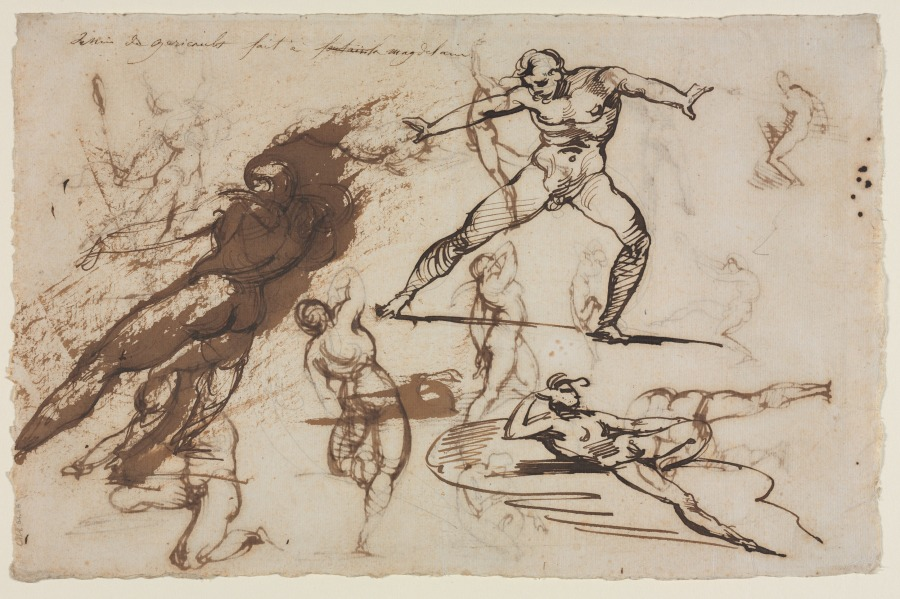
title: Sheet of Sketches (recto and verso)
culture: France, 19th century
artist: Théodore Géricault (French, 1791–1824)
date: 1819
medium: pen and brown ink on ivory laid paper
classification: Drawing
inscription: inscribed, in brown ink, at upper left: dessin de gericault fait à fontain la magdelaine; watermark, at center: scallop shell (possibly J. Berger or J. Bouchet)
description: The inscription at the upper left of the sheet states that Géricault executed these studies at the spring of the Magdelaine, near the forest of Fontainebleau, which he visited in 1819. The male figures closely resemble the earlier studies he made while in Italy of peasants during horse races at annual Roman carnivals. Here, men struggle to keep control of their unseen animals during the moments before the race. The verso female figures, visible though the paper, derive directly from Pompeiian paintings of bacchanals, or revelers participating in festivals honoring Bacchus, the god of wine.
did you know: Géricault died at a young age and had a professional career lasting only just over a decade.